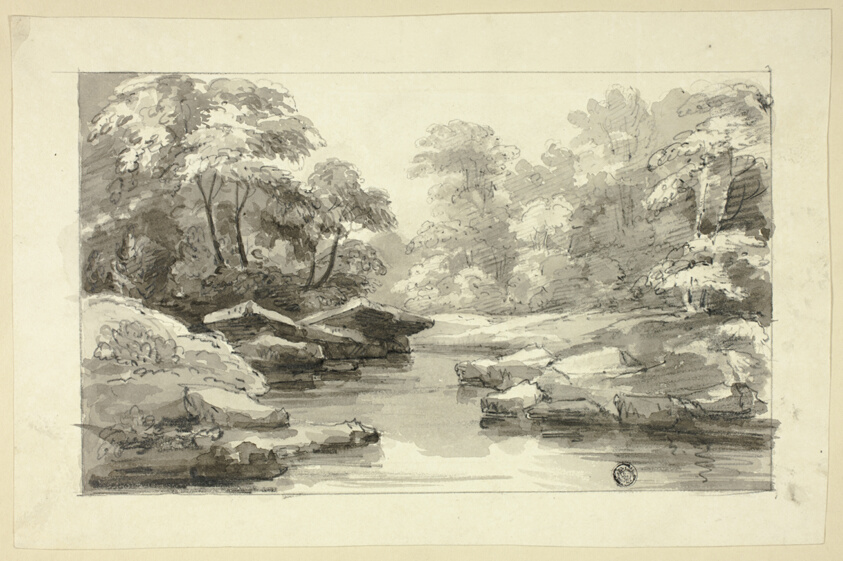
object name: Drawing and Watercolor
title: View Along Stream and Wooded Banks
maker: Style of Sir George Howland Beaumont (English, 1753-1827)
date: c. 1820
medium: Graphite, with brush and gray wash, on ivory wove paper, tipped on cream wove paper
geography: United Kingdom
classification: ink or chalk wash; drawings (visual works); prints and drawing